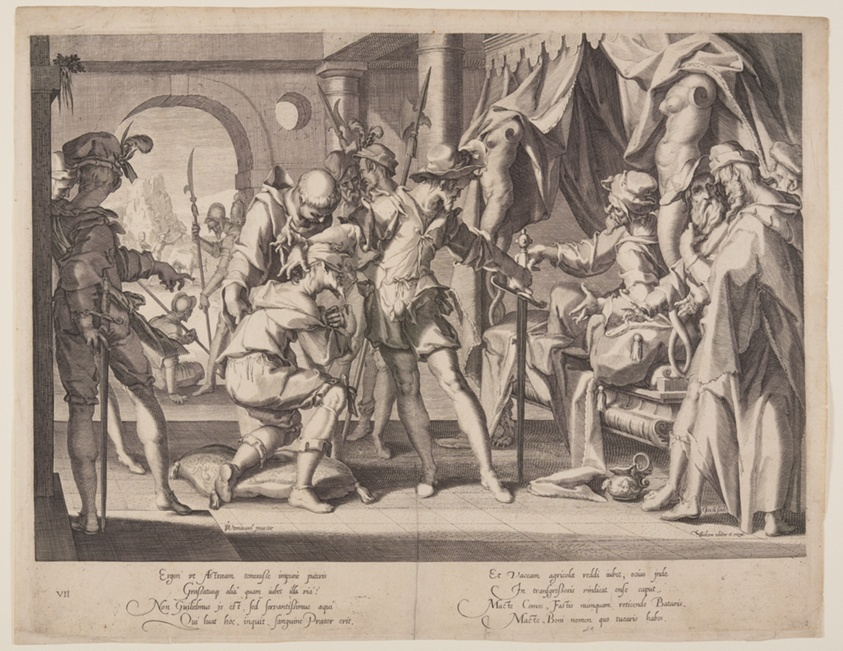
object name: Print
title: Count William Permitting Beheading, plate 7 from Thrones of Justice (Thronus Iustitiae)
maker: Willem van Swanenburgh (Dutch, 1580–1612); after Joachim Wtewael (Dutch, 1566–1638)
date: 1606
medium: Engraving on ivory laid paper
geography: Netherlands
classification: print; paper; prints and drawing; engraving